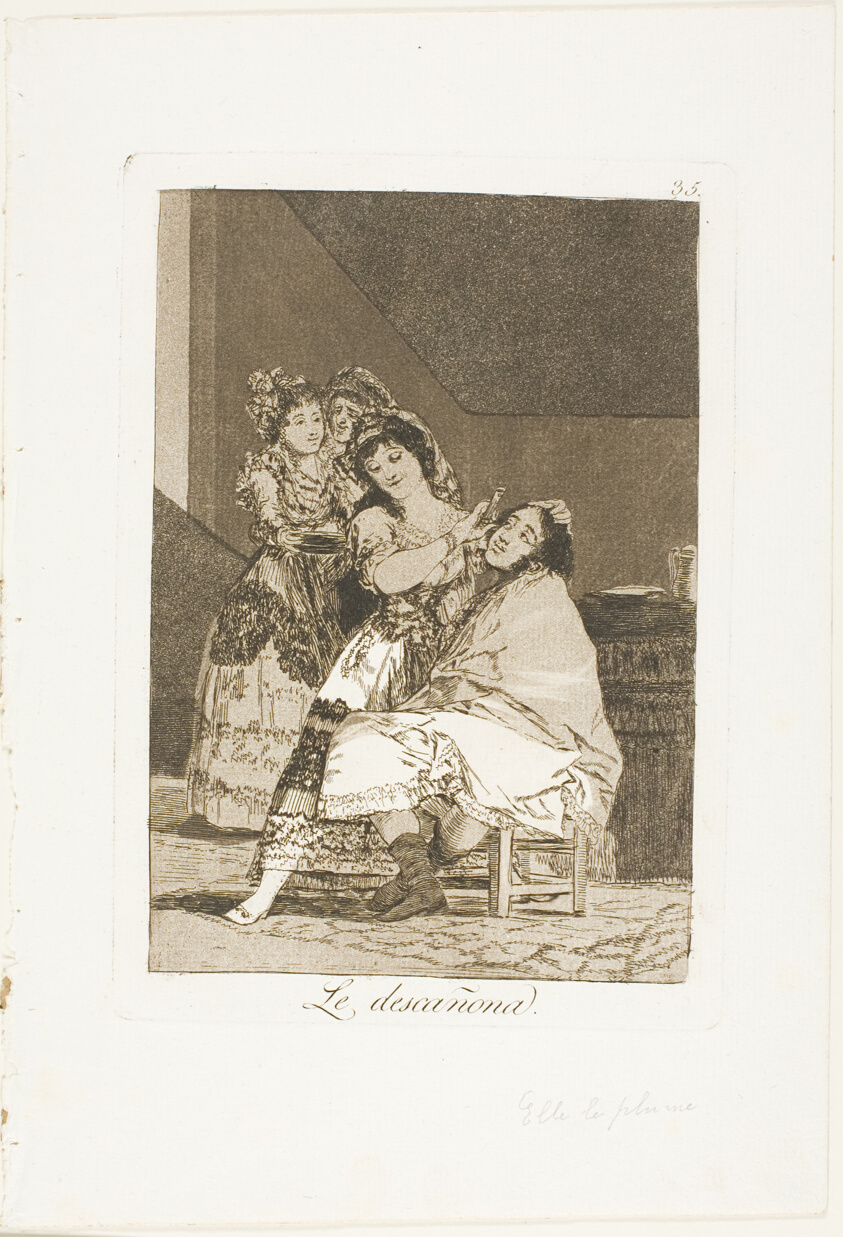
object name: Print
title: She Fleeces him, plate 35 from Los Caprichos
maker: Francisco José de Goya y Lucientes (Spanish, 1746-1828)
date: 1797/99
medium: Etching and aquatint on ivory laid paper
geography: Spain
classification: etching; print; prints and drawing